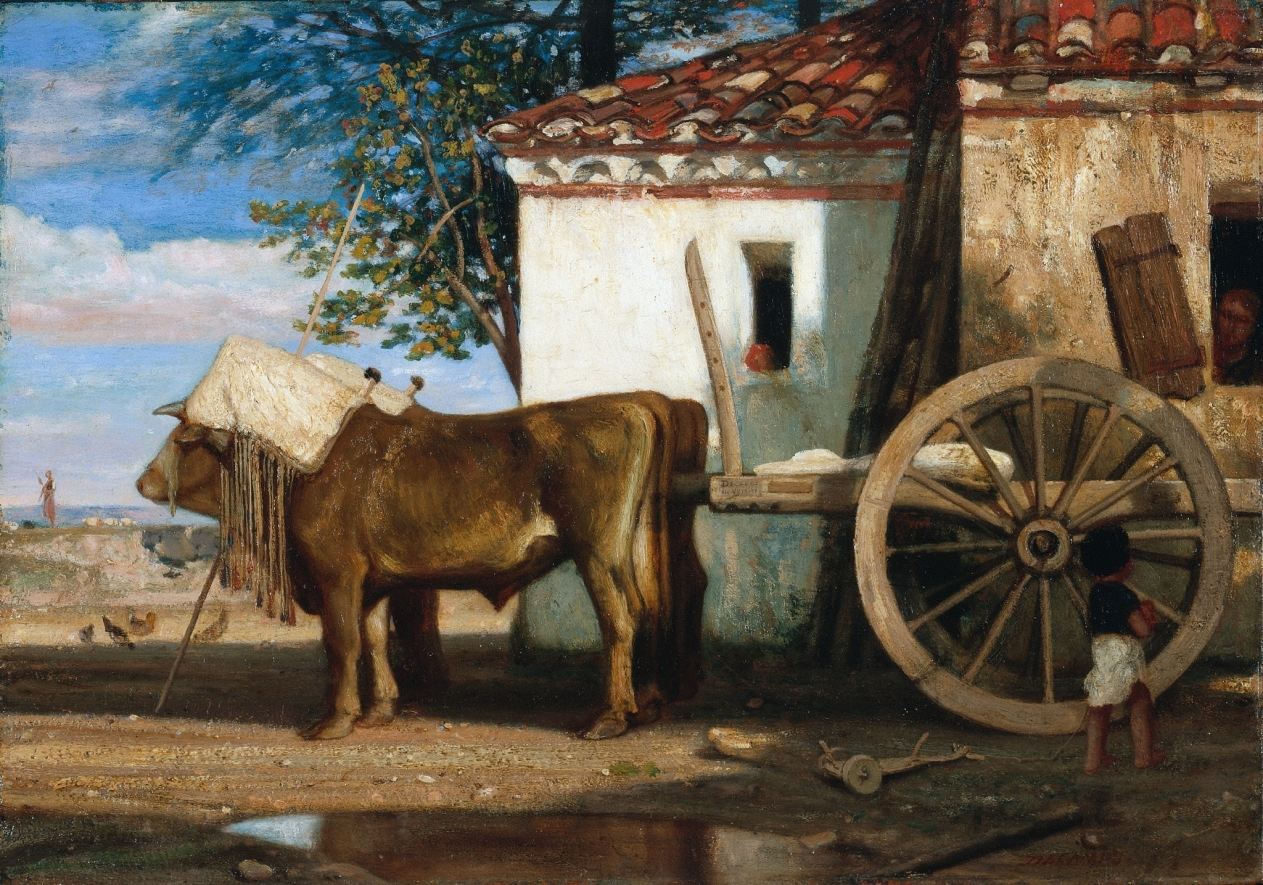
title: Oxen before a Farmhouse at Le Verrier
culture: France, 19th century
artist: Alexandre-Gabriel Decamps (French, 1803–1860)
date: c. 1853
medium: oil on wood panel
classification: Painting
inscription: Signed: lower right in red: decamps.; on cart: Decamps / au Veirier; on sac laying on cart: dc